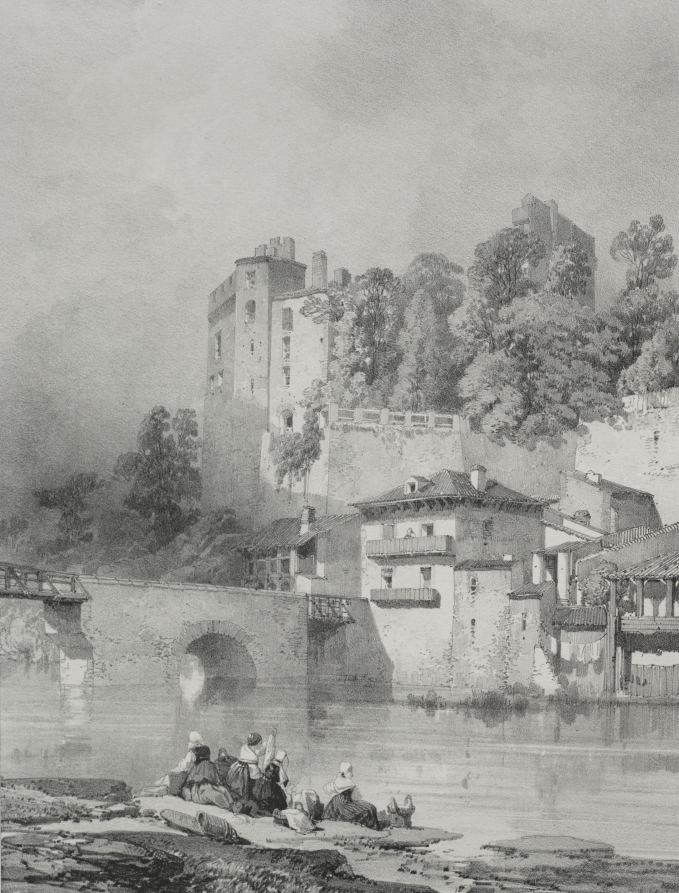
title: Voyages pittoresques et romantiques dans l'ancienne France. Bretagne: Chateau de Clisson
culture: France, 19th century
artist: Eugène Cicéri (French, 1813–1890)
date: c. 1845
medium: lithograph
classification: Print